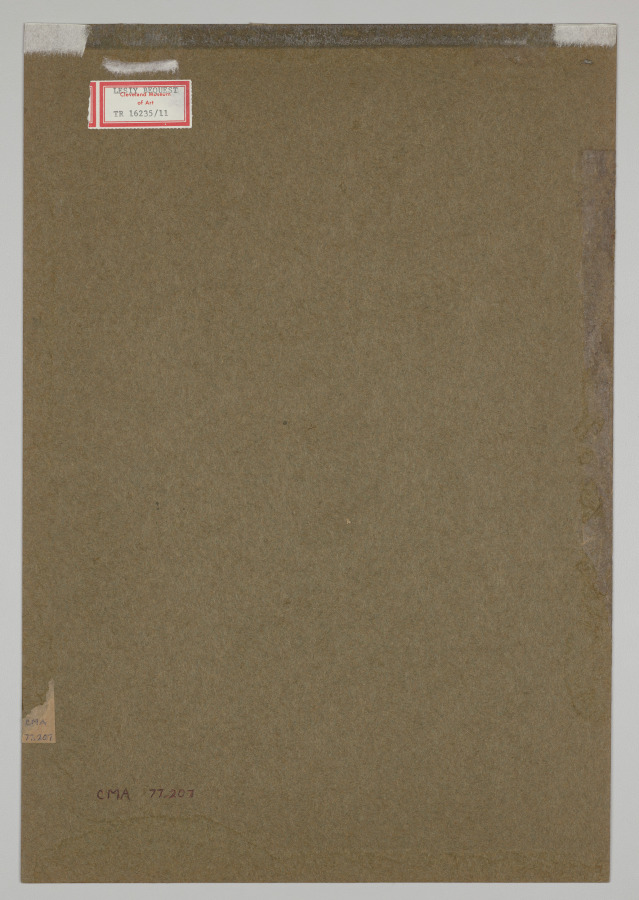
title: Persian calligraphy framed by an ornamental border of flowers, birds, and deer, from the Late Shah Jahan Album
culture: Mughal India, court of Shah Jahan (reigned 1628–58)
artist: Mir 'Ali Haravi (Persian, active in Herat, Afghanistan, died c. 1550)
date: calligraphy: c. 1500–1540; border: c. 1630–40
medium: Gum tempera, gold, and ink on paper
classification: Painting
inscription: Ever since knotted locks of your hair were tied around your throat,/ My neck has also been chained by your tresses./ Henceforth my lot is to lament and cry,/ sounding like the [awakening] caravan bell,/ Protesting against these fellow travelers who have tied a heavy load on a nightingale.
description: About 100 years after the calligraphy was completed by a Persian master and embellished with gold and floral arabesques, the small page was mounted into an album for the Mughal emperor of India. Mughal artists filled the outer border with floral vines, blooming and budding with many varieties. Pairs of birds perch throughout; male and female deer relax, listening to the birdsong. The Indian artists chose to emphasize nature’s abundance and life-giving forces, whereas the Persian artists sought to achieve exquisite, gemlike refinement. The central poem, by Ibn-i Yamin (Persian, 1286–1368), encourages the reader not to worry about unexpected calamities.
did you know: On the right, two white-throated kingfishers, a species native to Asia, sit on thin vines.